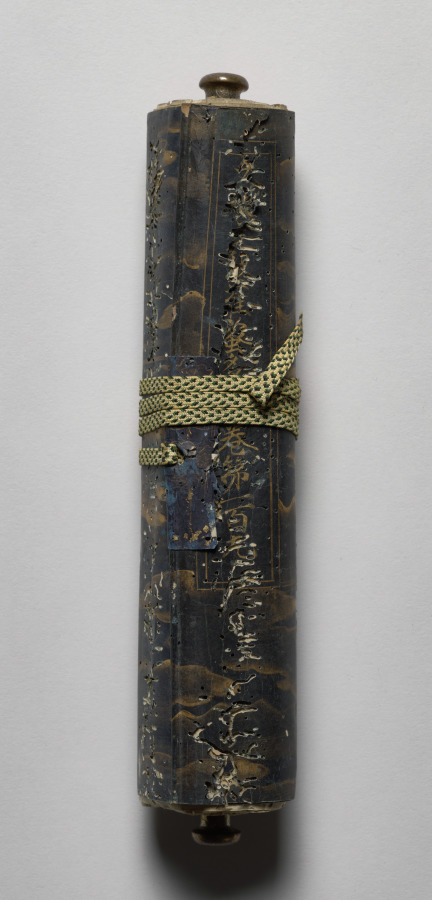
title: Volume from the Great Perfection of Wisdom Sutra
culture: Japan, Heian period (794–1185)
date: late 1100s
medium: Handscroll; ink and gold on dyed paper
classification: Manuscript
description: This scroll is part of the 600-volume Great Perfection of Wisdom Sutra. The sacred text addresses the perfection of wisdom and the nonsubstantiality of all phenomena, or the emptiness of all things. It takes the form of Shakyamuni Buddha’s preaching at four locations. This scroll is from the Perfection of Wisdom in 100,000 Lines, which occupies the first 400 volumes. At one time, religious clergy kept all the scrolls in a lacquered wood repository. They are now too fragile to open and we will conserve them over time.